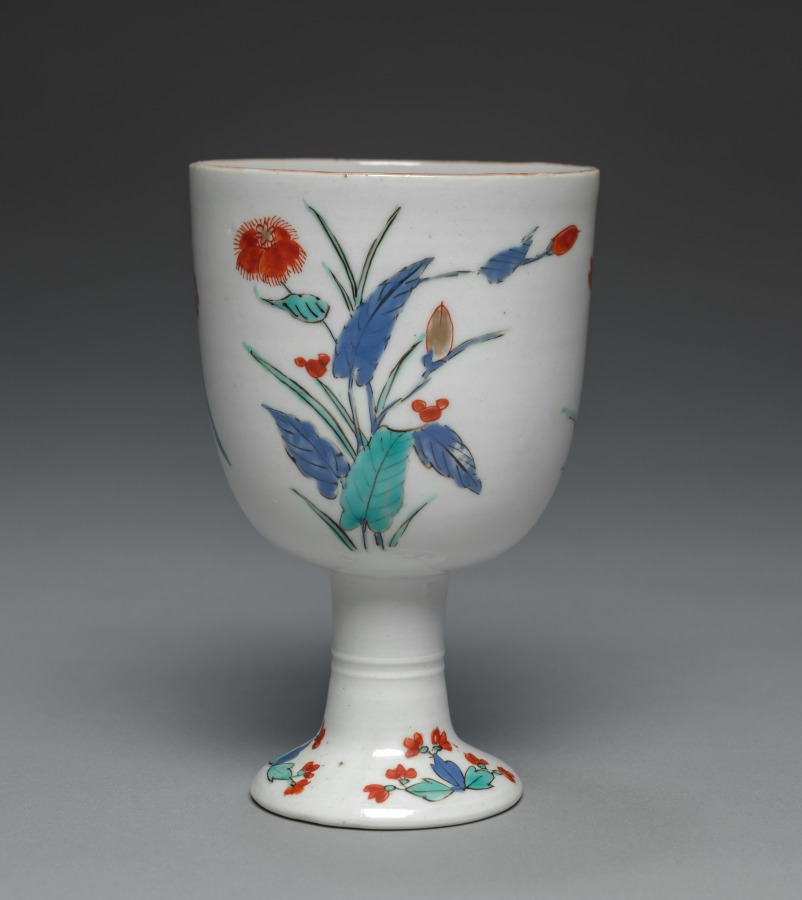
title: Goblet with Flowers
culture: Japan, Edo period (1615–1868)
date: c. 1700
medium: porcelain with overglaze color enamel and gold (Hizen ware Ko-Imari style)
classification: Ceramic